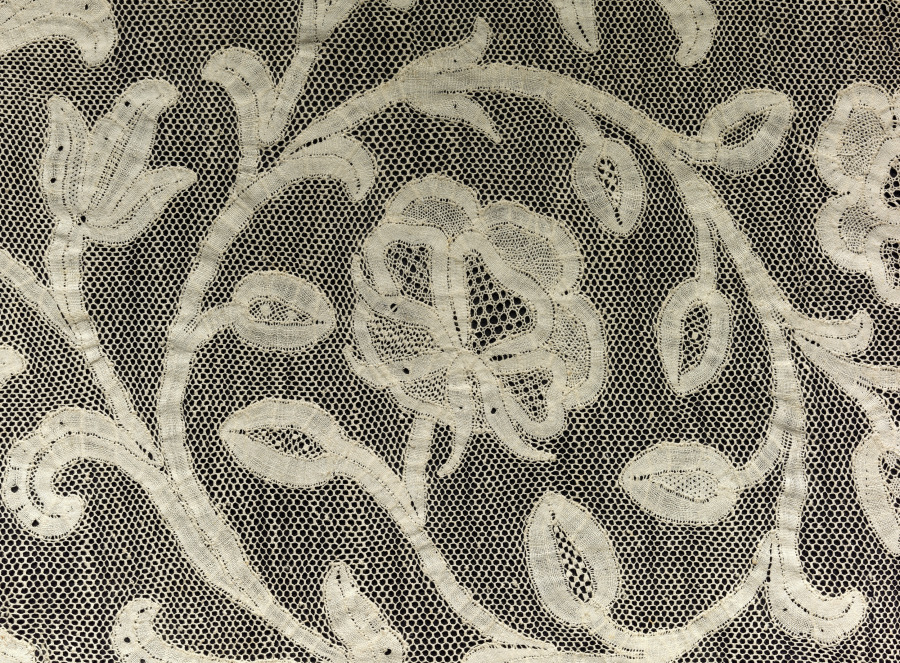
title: Fragment of Lace Flounce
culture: Italy, Milan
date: 1700–1720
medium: Linen: bobbin lace design on mesh ground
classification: Lace